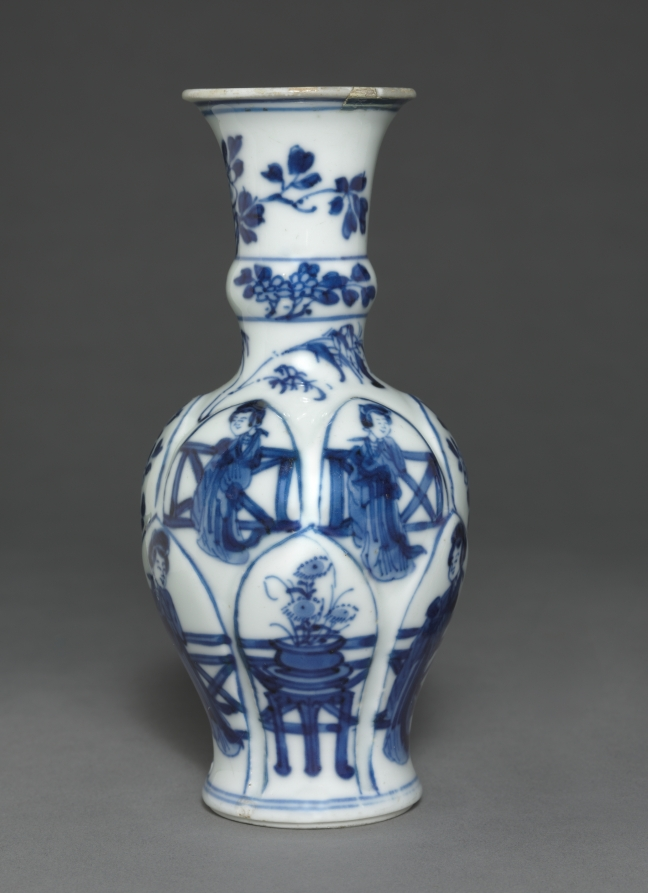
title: Vase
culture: China, Qing dynasty (1644-1911), Daoguang reign (1821-1850) - Xianfeng reign (1851-1861)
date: 19th Century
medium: porcelain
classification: Ceramic